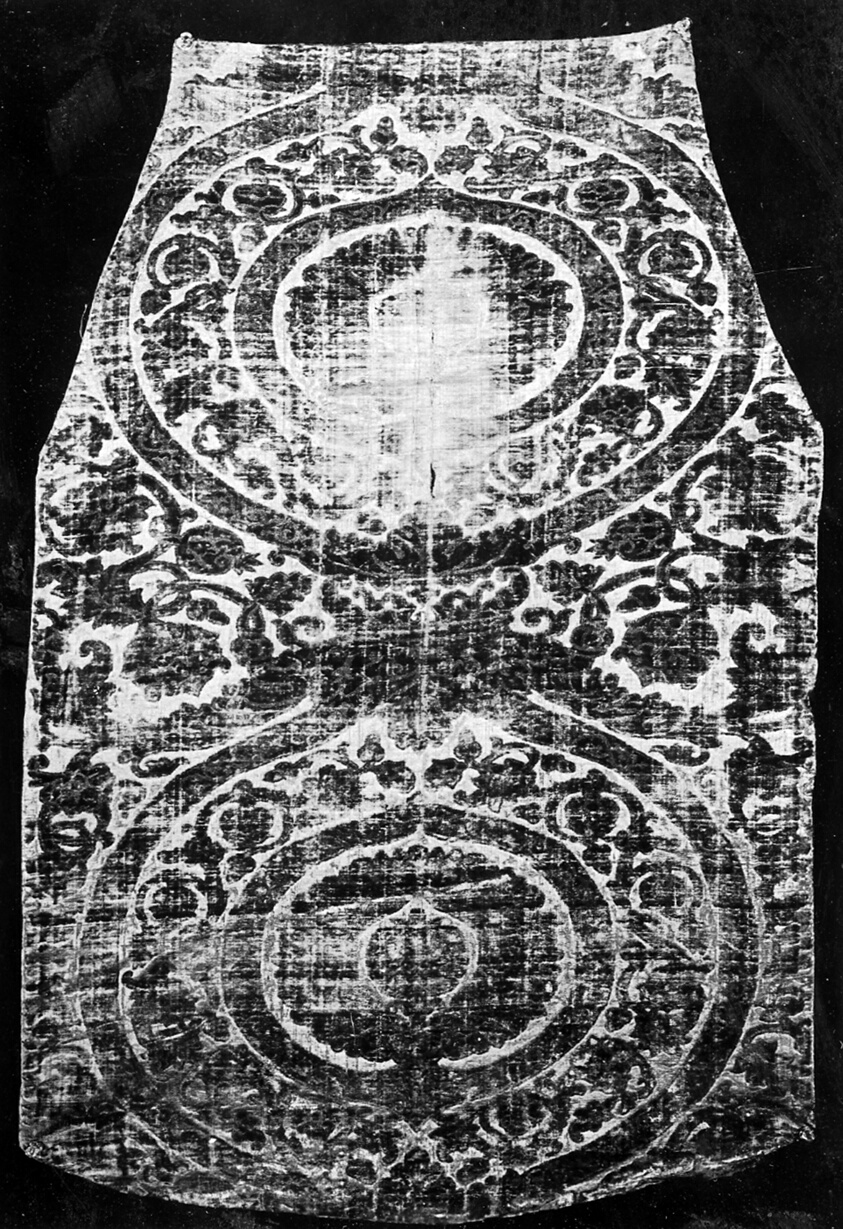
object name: Textile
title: Fragment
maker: Italy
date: Mid–16th century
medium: cisele voided satin velvet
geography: Italy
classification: textile; weaving - velvet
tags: pomegranates